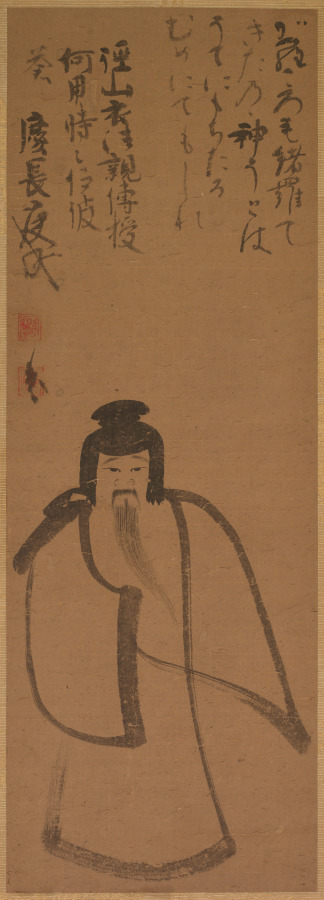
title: Tenjin Traveling to China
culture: Japan, Momoyama period (1573–1615)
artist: Konoe Nobutada (Japanese, 1565–1614)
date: 1610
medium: hanging scroll; ink on paper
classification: Painting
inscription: signed: Nobutada's cipher signature kao inscribed: two poems above, dated Keicho 15